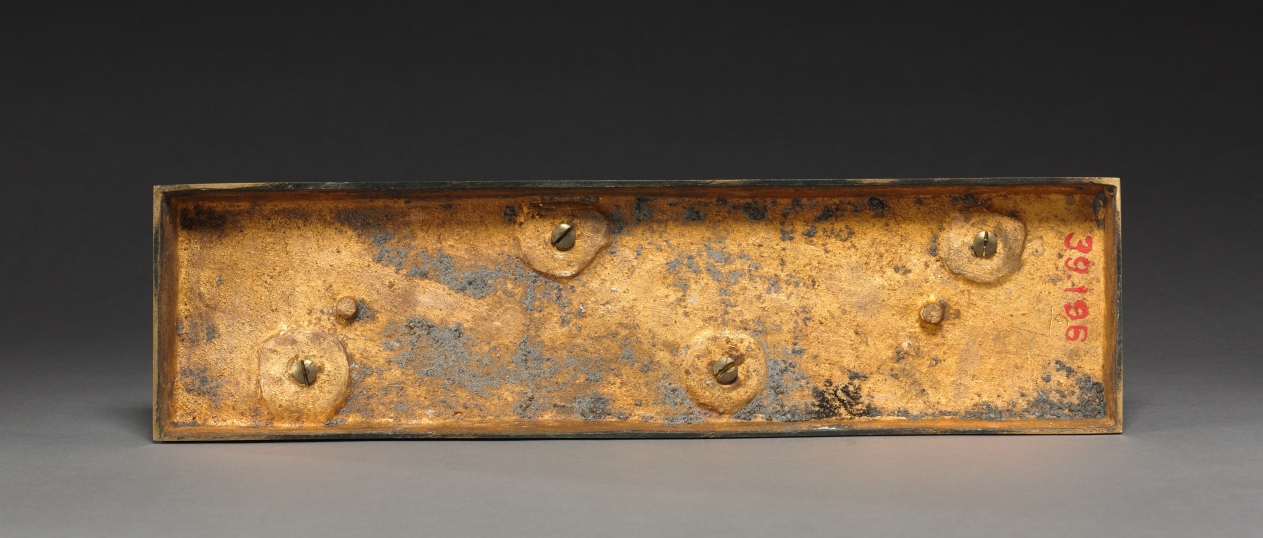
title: Walking Lion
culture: France, 19th century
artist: Antoine-Louis Barye (French, 1796–1875)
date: after 1836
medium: bronze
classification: Sculpture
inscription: Written on base: "Barye"